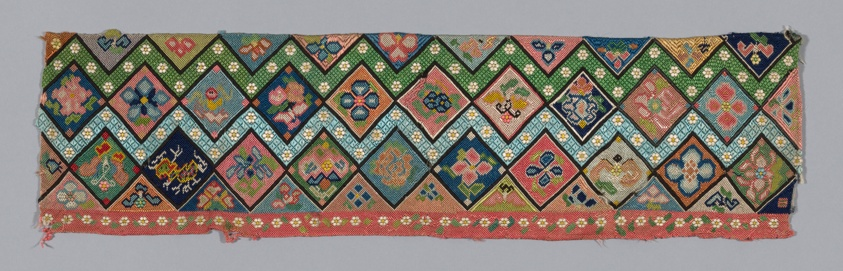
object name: Costume and Accessories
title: Trouser Band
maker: Han-Chinese (China)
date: Qing dynasty (1644–1911), 1875/1900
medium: Forty-four pairs and eight odd pieces of embroidered sleeve, ankle bands, etc. on gauze.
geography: China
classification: textile; embroidery; costume - embroidery; costume